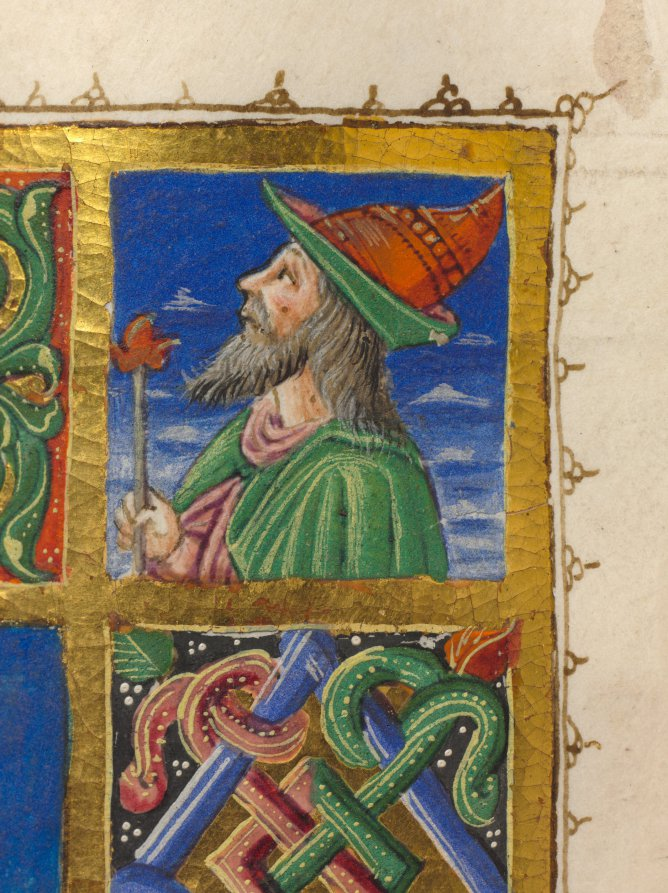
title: Missale: Fol. 185v: Crucifixion with borders (full page)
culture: Italy, Perugia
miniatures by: Bartolommeo Caporali (Italian, c. 1420–1503)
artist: assisted by Giapeco Caporali (Italian, d. 1478)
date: 1469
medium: ink, tempera and burnished gold on vellum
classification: Bound Volume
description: This illuminated manuscript once served as a liturgical service book used on the high altar by a priest for the Mass. The missal’s colophon (inscription) identifies the book as belonging to the church of San Francesco in Montone, a convent of Franciscan friars, and gives its date of completion as October 4, 1469. Here, the volume is opened to its masterpiece, two pages that introduce the canon of the Mass, the most solemn part of the celebration during which the priest consecrates the Eucharistic bread and wine. The missal receives its name from the two Perugian artists who collaborated to illuminate its pages. Here, the Calvary scene featuring the crucified Christ flanked by the Virgin and Saint John is the work of Bartolomeo Caporali, and the marginal decoration and the facing page are likely the work of his brother, Giapeco. Saint Francis’s appearance at the foot of the cross attests to the missal’s Franciscan use and affiliation.